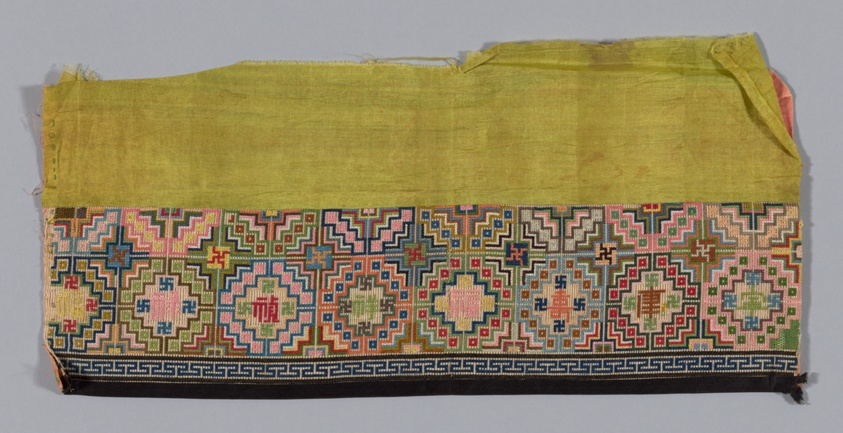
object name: Costume and Accessories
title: Trouser Band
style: qing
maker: Han-Chinese (China)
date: Qing dynasty (1644–1911), 1875/1900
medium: embroidered on gauze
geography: China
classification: textile; embroidery; costume - embroidery; costume